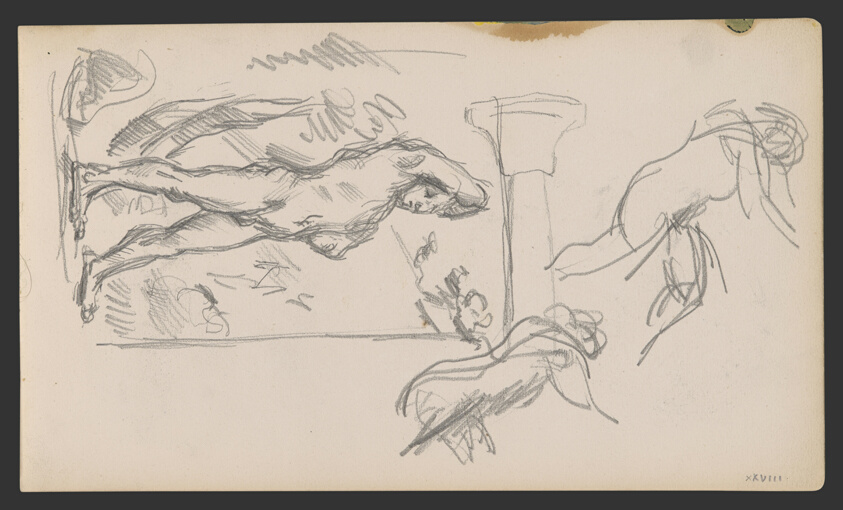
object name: Drawing and Watercolor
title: Sketchbook No. 2 (L'Estaque)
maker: Paul Cézanne; French, 1839-1906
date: 1875–86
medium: Graphite and pen and ink drawings on paper, bound into a book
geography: France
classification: sketchbook; graphite; prints and drawing; paper